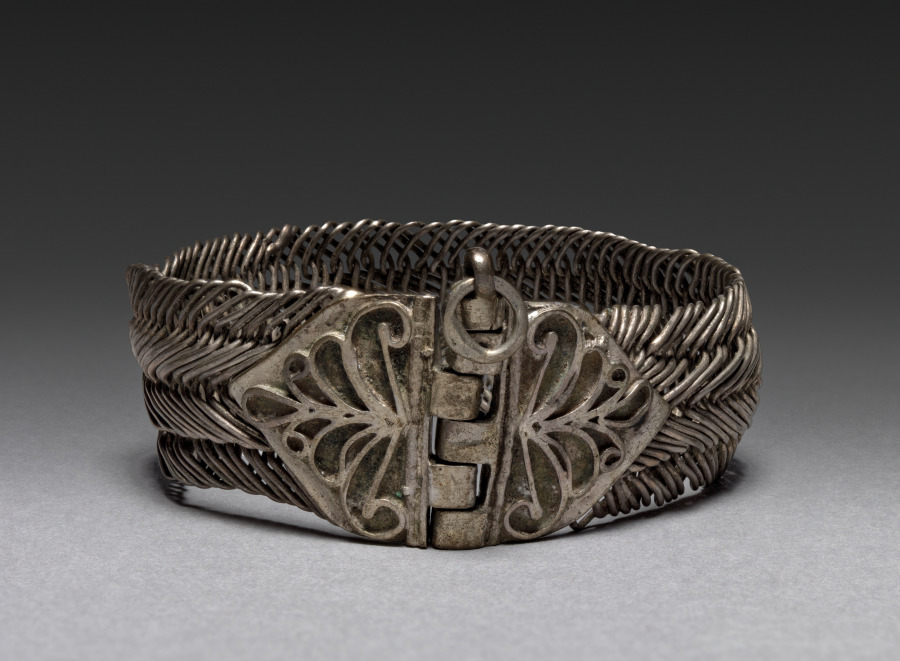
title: Bracelet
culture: Bulgaria, 18th-19th century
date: 1700s-1800s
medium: silver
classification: Jewelry